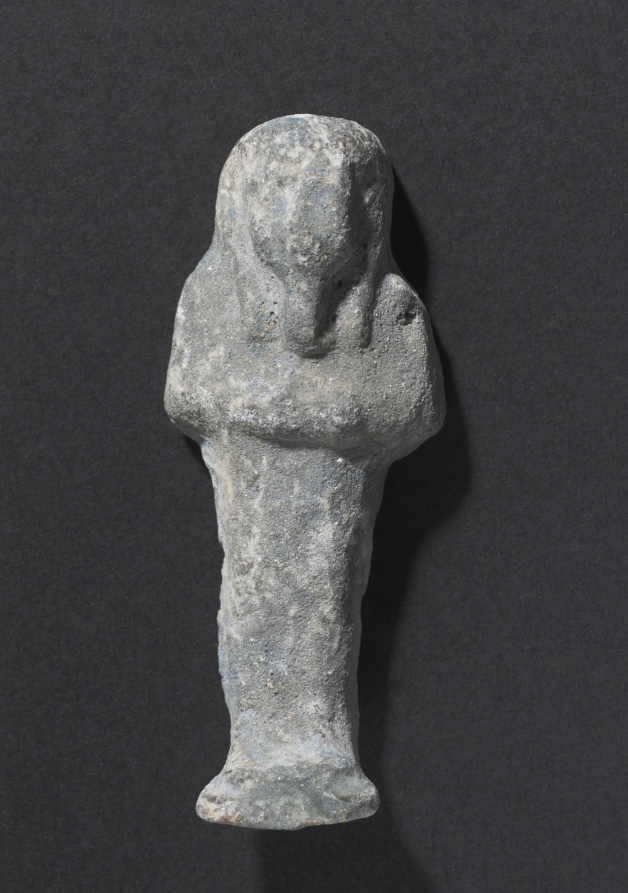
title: Shawabty of Ditamenpaankh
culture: Egypt, Late period (715–332 BCE), Dynasty 25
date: 715–656 BCE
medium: terracotta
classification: Funerary Equipment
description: High demand for shawabtys in the Late Period, a time when as many as 400 or more shawabtys were placed in the tomb with the deceased, gave rise to a specialized container for storing them: the shawabty box. This example is inscribed for the lady of the house, Ditamenpaankh, and was probably one of a pair originally made for her. The single-masted boat on the box's lid is perhaps an allusion to the pilgrimage of the deceased to the holy city of Abydos, the cult city of Osiris, king of the dead. The shawabtys inside are crude, mass-produced examples cast in an open mold. Made of terracotta, their blue paint imitates more costly shawabtys made of faience. As for the shawabty spell, it has been removed from its traditional location on the shawabty's front and relocated onto the sides of box, where it needed only to be written once, thus expediting production.